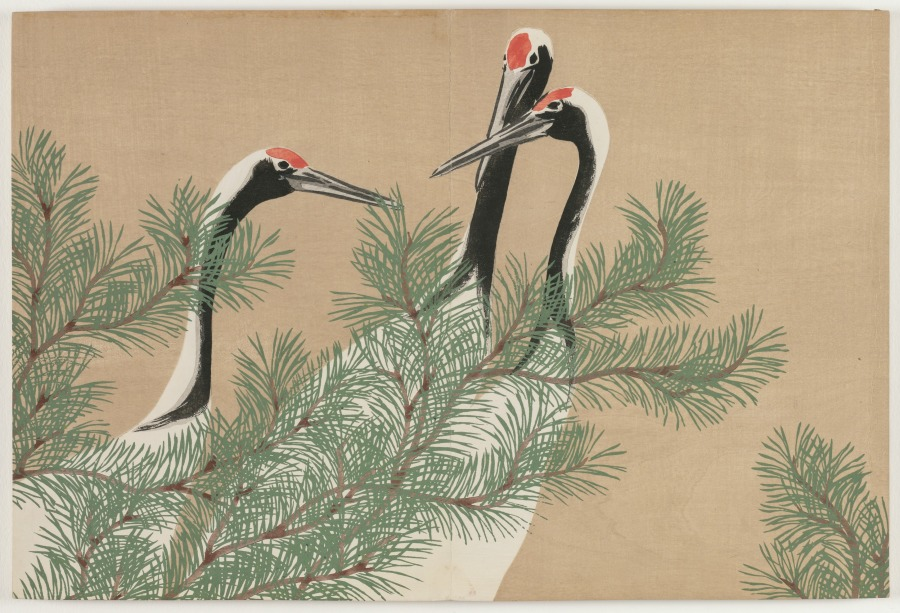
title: Flowers of a Hundred Worlds (Momoyogusa): Cranes (Tsuru)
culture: Japan, Meiji period (1868–1912)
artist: Kamisaka Sekka (Japanese, 1866–1942)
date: 1909–10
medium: color woodcuts with gold and silver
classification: Bound Volume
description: This print from a set of three woodblock printed albums displays the graphic design prowess of Kamisaka Sekka. The images were first distributed one by one to subscribers to the series but later were reissued in bound form, like this book, for mass consumers. Each print features a vignette taken from nature or Japanese literature. Many of the scenes have a long history in Japan, originating in the 900s or 1000s and having been interpreted by all manner of artists since that time. Sekka’s selections hew closely to precedents from the Rinpa style originated by painter Tawaraya Sōtatsu (c. 1570–c. 1640) and calligrapher Hon’ami Kōetsu (1558–1637).